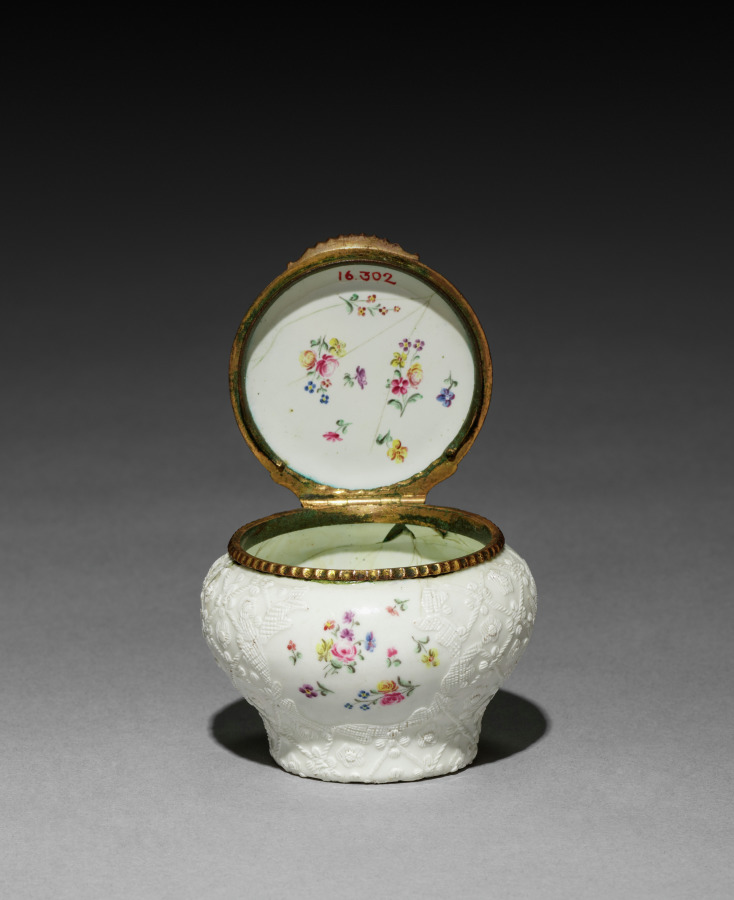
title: Box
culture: England, Staffordshire, 18th century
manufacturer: South Staffordshire Factory (British)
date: c. 1770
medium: enamel on copper with metal mounts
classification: Miscellaneous